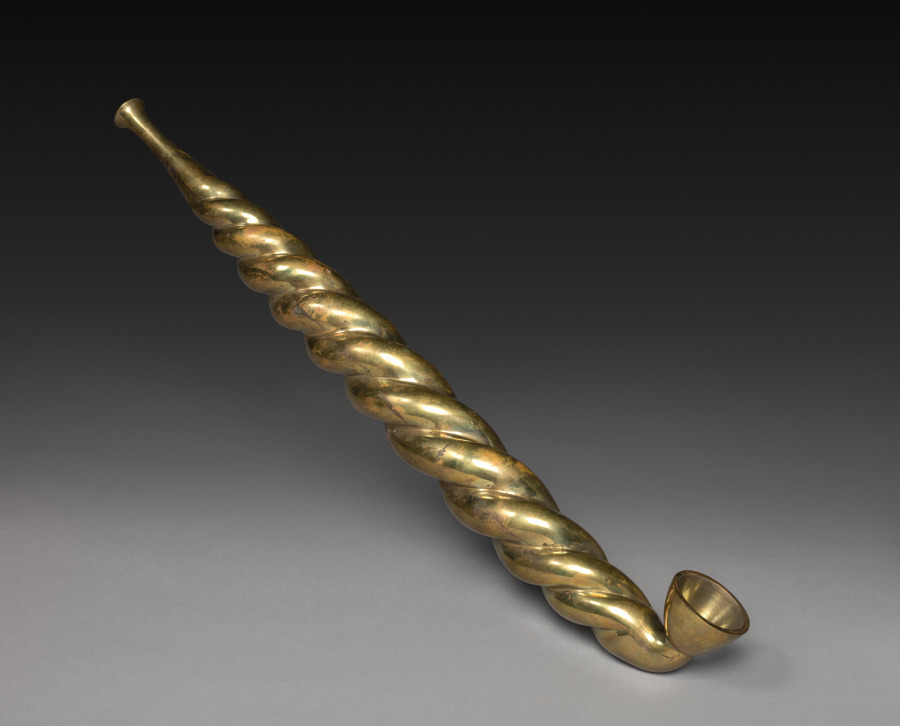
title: Tobacco Pipe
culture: Japan, Edo period (1615–1868)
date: early to mid-1800s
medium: brass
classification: Miscellaneous